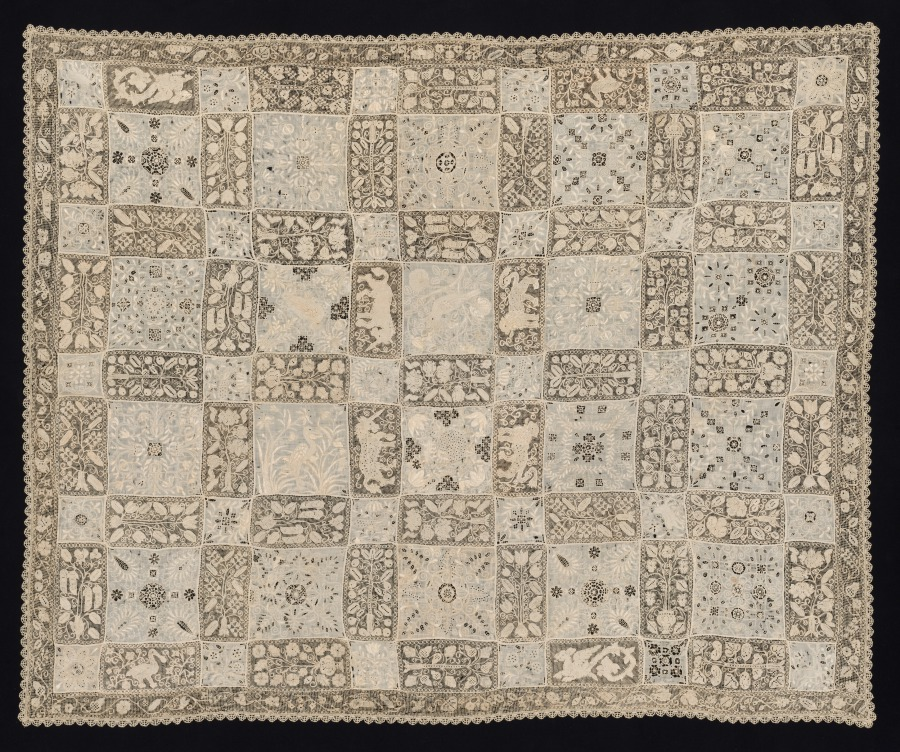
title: Cloth with Unicorns, Dragons, Other Animals, and Floral Patterns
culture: Italy, 1800s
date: 1800s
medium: Bleached linen: needle lace, filet/lacis (knotted ground and darned in two directions) and alternating cutwork, embroidered squares, and bobbin lace edging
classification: Lace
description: Scattered throughout this textile are depictions of both real and imaginary animals: unicorns and dragons exist alongside lions, stags, and an assortment of birds. There are also identifiable plants, flowers, and fruits as well as simply decorative or fictional ones. The maker, whose initials CM appear between the unicorns, perhaps chose to mix fantastical motifs with natural ones to create a more captivating spectacle. This large textile was perhaps meant for use as a table cover.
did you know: The two-legged dragon with a barbed tail at the corners of the lace cloth is called a wyvern.